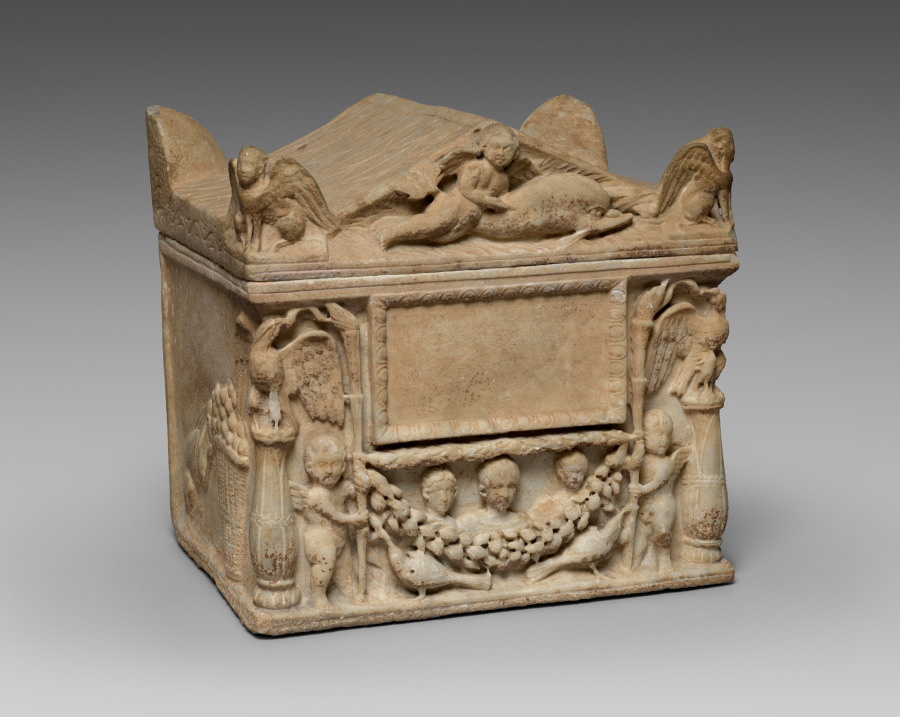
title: Cinerary Box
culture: Italy, Roman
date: 1–100 CE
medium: marble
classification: Sculpture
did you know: The central rectangular plaque would have been inscribed with an epitaph, either painted or carved.